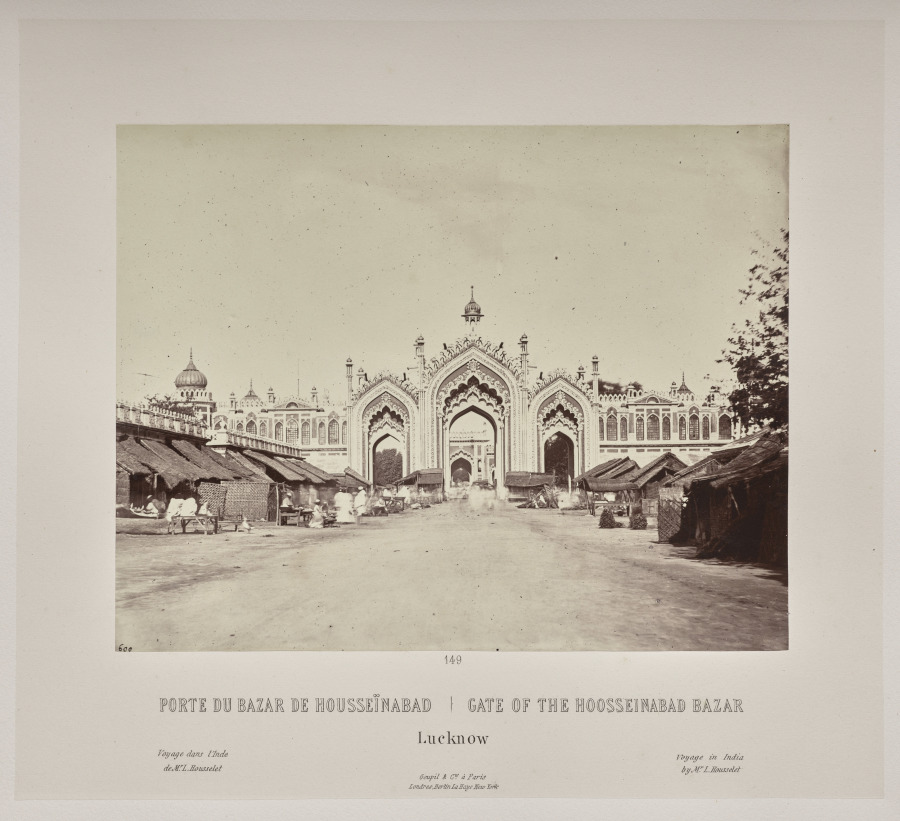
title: Gate of the Hoosseinabad Bazar, Lucknow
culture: France, 19th century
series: India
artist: Louis-Théophile Marie Rousselet (French, 1845–1929)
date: 1865–68, published 1869–70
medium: Albumen print from glass plate negative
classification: Photograph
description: Concerned that his drawings did not do justice to the splendor of India’s monuments, Rousselet learned photography in India that year, a remarkable accomplishment. He proved to be a talented photographer with a sophisticated sense of composition. The scenes in this volume sweep across sites of Sultanate, Rajput, and Mughal power in northern India, from the sacred Hindu city of Varanasi on the Ganges River to Alwar in Rajasthan. Also included are several scenes of industry and portraits of Indian rulers.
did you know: Louis Rousselet described himself as a “scientific traveler” when he went to India alone at age 18 in 1863 and stayed into 1868.